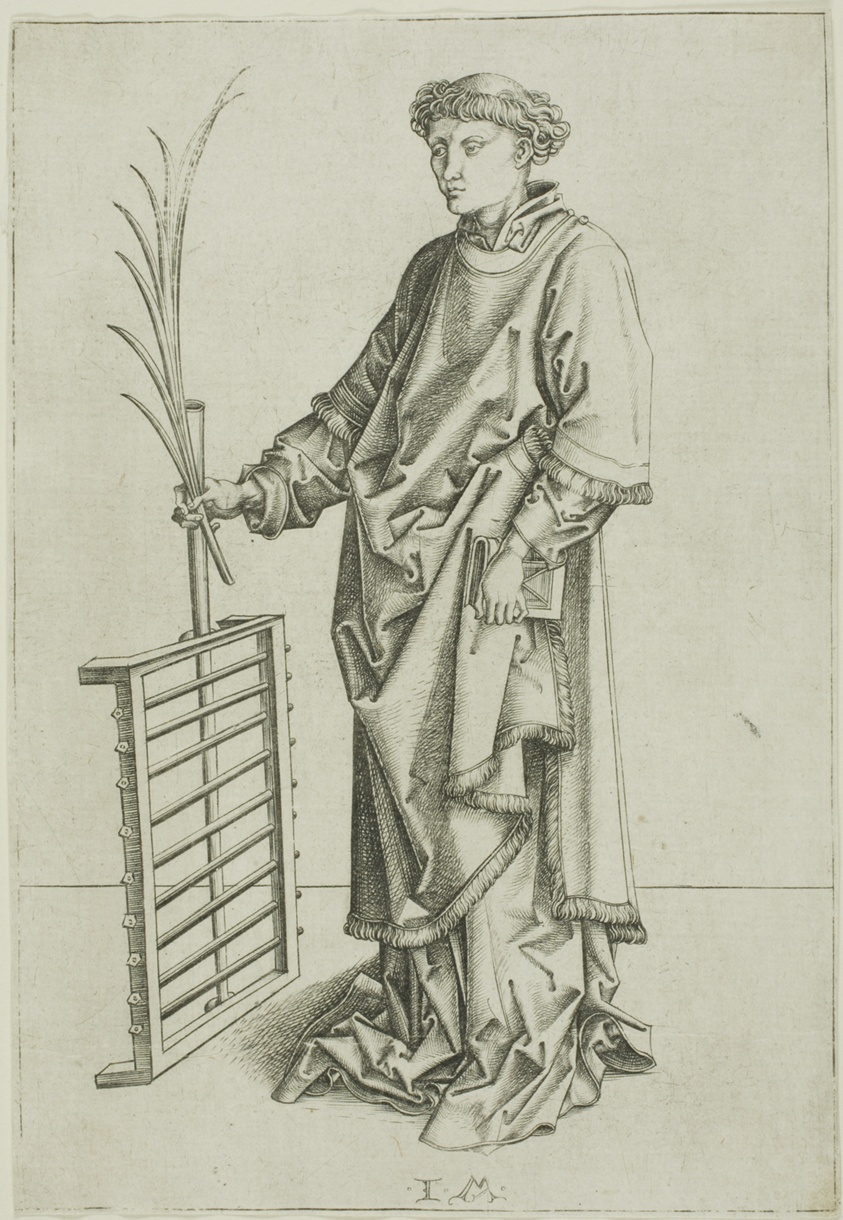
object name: Print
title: St. Laurence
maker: Israhel van Meckenem the Younger (German, c. 1440/45-1503); after Martin Schongauer (German, c. 1430/50-1491)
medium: Engraving in black on ivory laid paper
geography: Germany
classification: engraving; print; prints and drawing